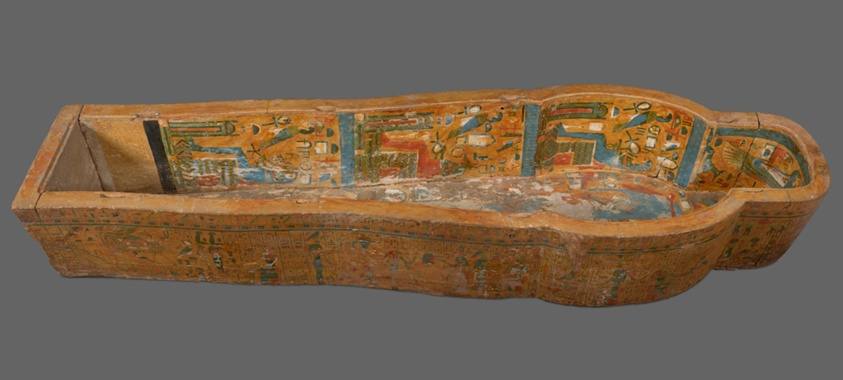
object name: Funerary Object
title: Coffin of Nespahertahat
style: twenty-first dynasty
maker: Egyptian; possibly Deir el-Bahri, Thebes (now Luxor), Egypt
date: Third Intermediate Period, Dynasty 21 (about 1069 –945 BCE)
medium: Wood and pigment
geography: Ancient Egypt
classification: coffin; ancient art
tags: funerary art